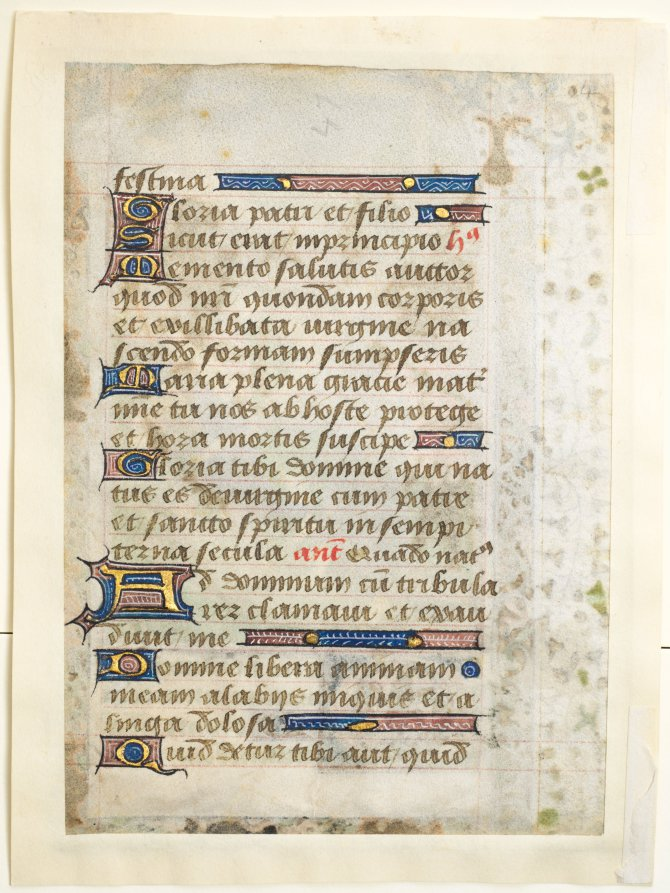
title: Leaf Excised from the Tarleton Hours: Christ Carrying the Cross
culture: Northern France, Normandy, Rouen?, 15th century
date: c. 1430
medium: ink, tempera, silver, and gold on vellum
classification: Manuscript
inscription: Deus in adiutorium meum intende. Domine ad adiuvandum me…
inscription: Festina. Gloria Patri, et Filio: et SSpiritui Sancto, Sicut erat in Principio. Memento salutis auctor. Quod nostri quondam corporis, Ex illibata virgine Nascendo, formam sumpseris. Ad Dominum cum tribularet, clamavi: et exaudivit me. Domine libera animam meam a labiis iniquis: et a lingua dolosa. Quid detur tibi, aut quid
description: Although the Hours of the Virgin are traditionally illustrated with scenes from the early life of Christ, sometimes the Passion of Christ, or the events leading up to and immediately after the Crucifixion, are used. This scene of Christ carrying the cross, used for the sixth hour (Sext), is placed between a scene of flagellation, or beating, and the Crucifixion. This book of hours uses the feminine pronoun in prayers, indicating that it had a female owner.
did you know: The images and decorated initials in the book helped users navigate to sections they needed.